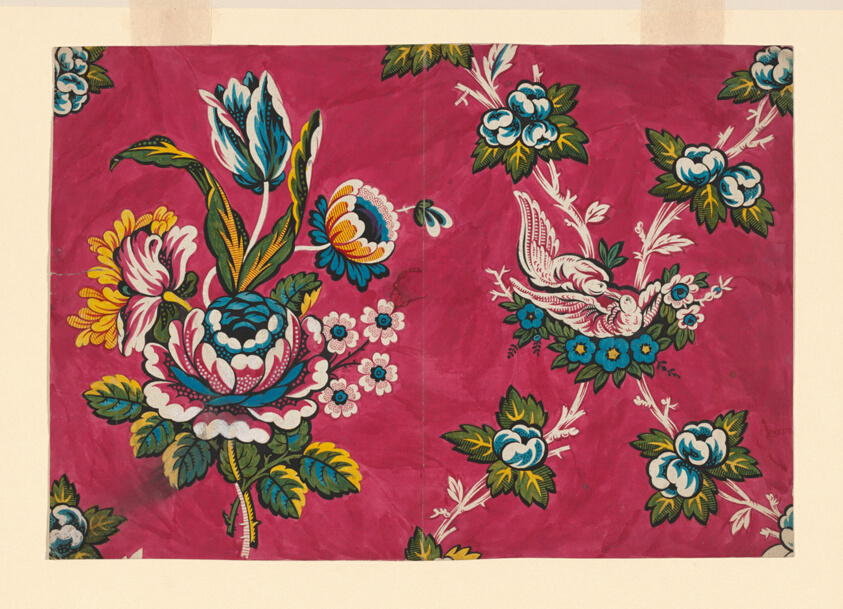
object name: Textile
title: Design for a Printed Textile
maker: France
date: 1725/50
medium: Watercolor and pencil on paper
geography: France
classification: textile; accessory - paper design